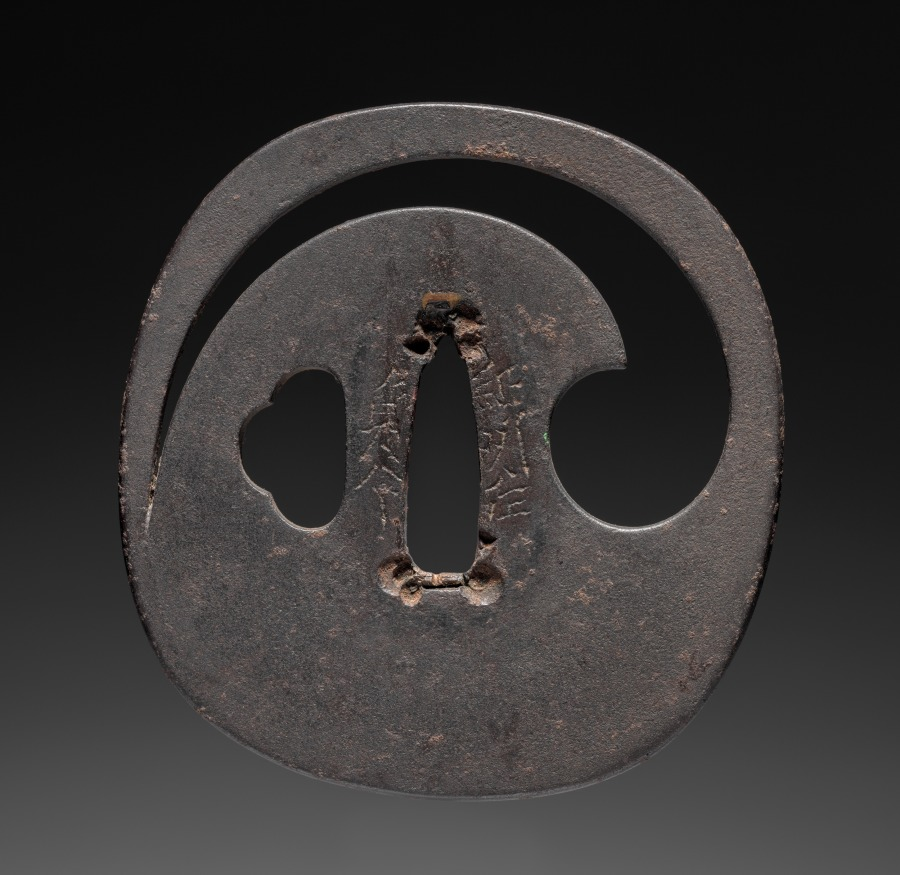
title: Sword Guard (Tsuba)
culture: Japan, possibly Edo period (1615-1868)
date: c. 1615–1868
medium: iron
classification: Arms and Armor